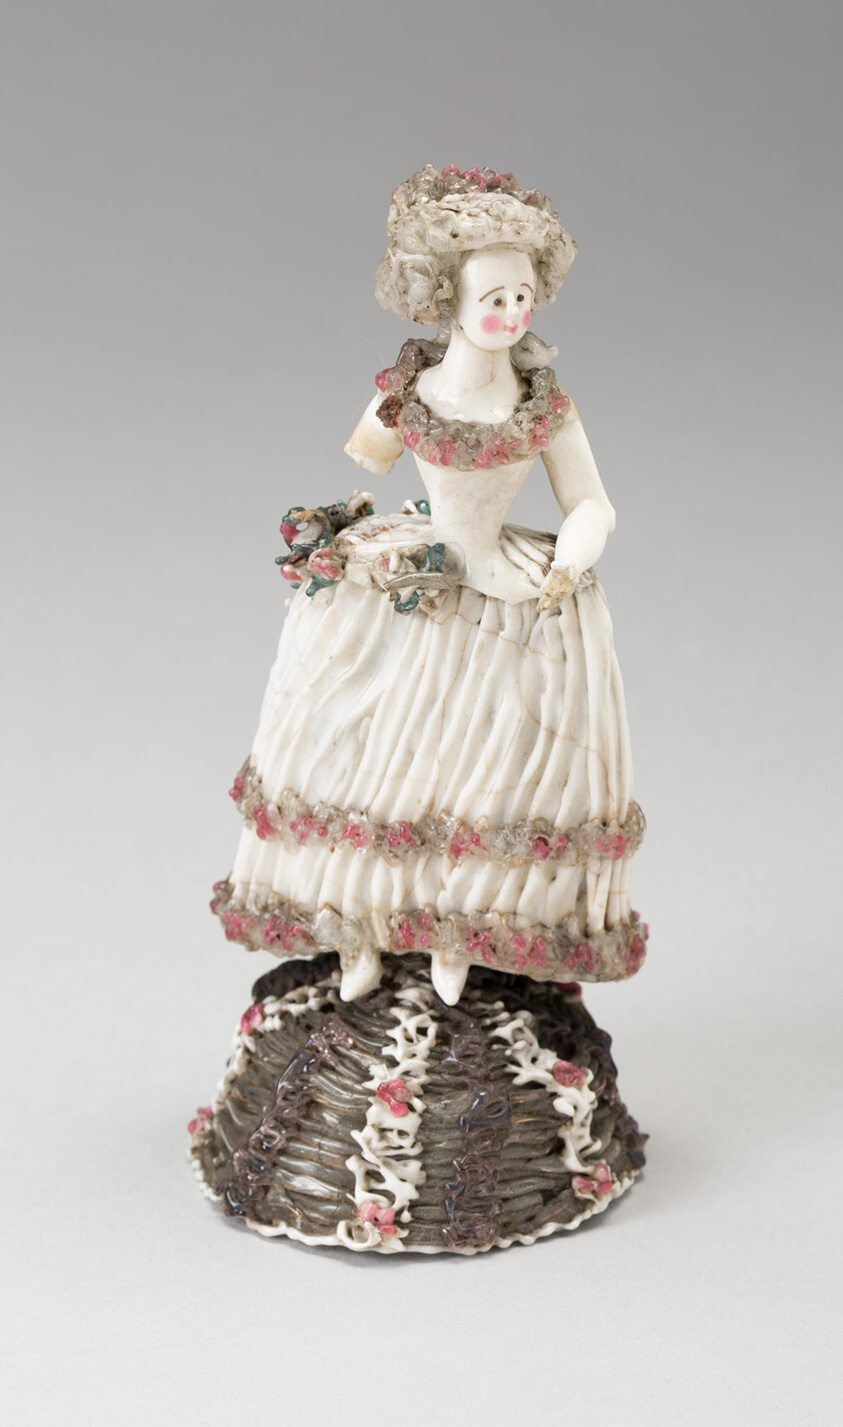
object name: Glass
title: Lady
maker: Nevers, France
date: 1750/99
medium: Glass; lampwork (verre de Nevers), metal armature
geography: France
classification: decorative object/ornament; lampwork; glass; european decorative arts